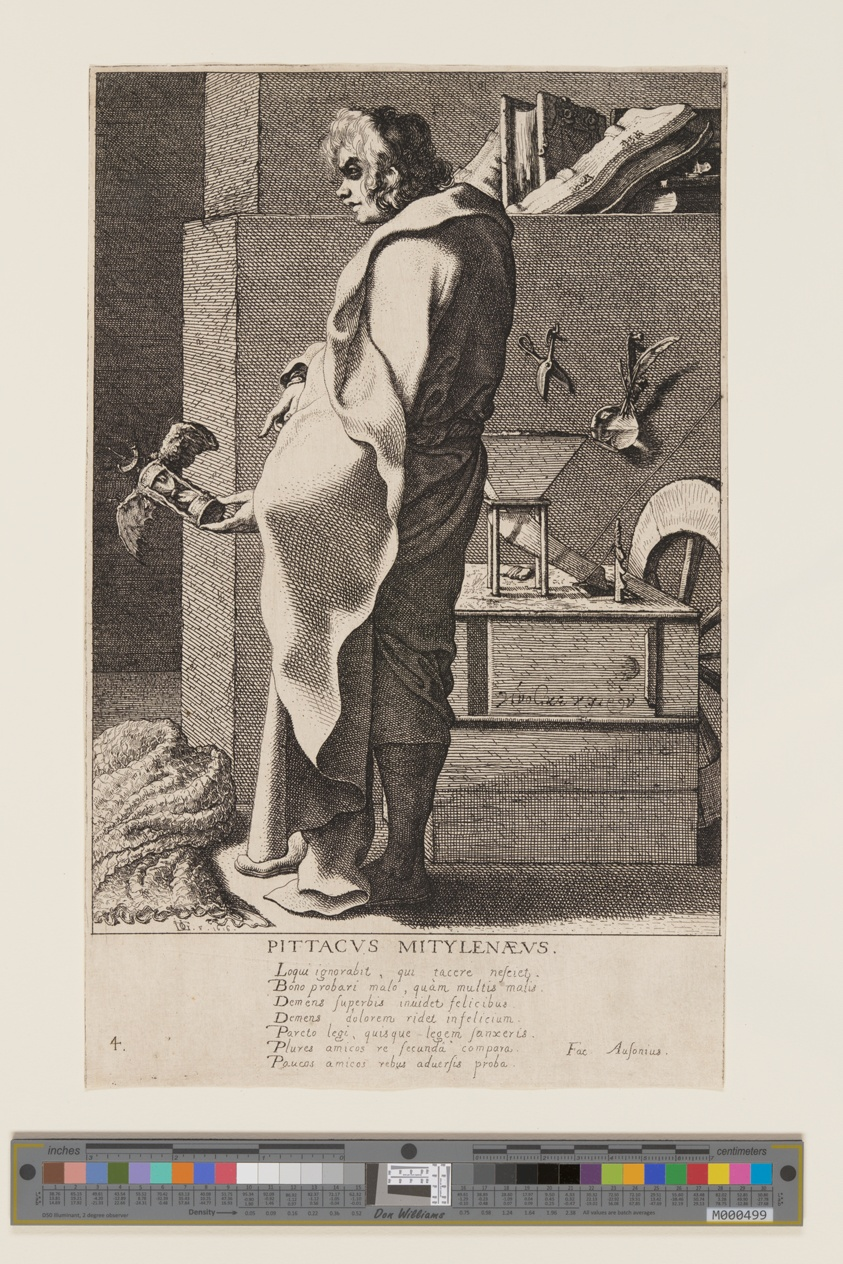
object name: Print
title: Pittacus Mitylenaeus, from Seven Wise Men of Greece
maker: Jacques de Gheyn III; Dutch, c. 1596-1641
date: 1616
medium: Etching on ivory laid paper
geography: Netherlands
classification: etching; paper; print; prints and drawing